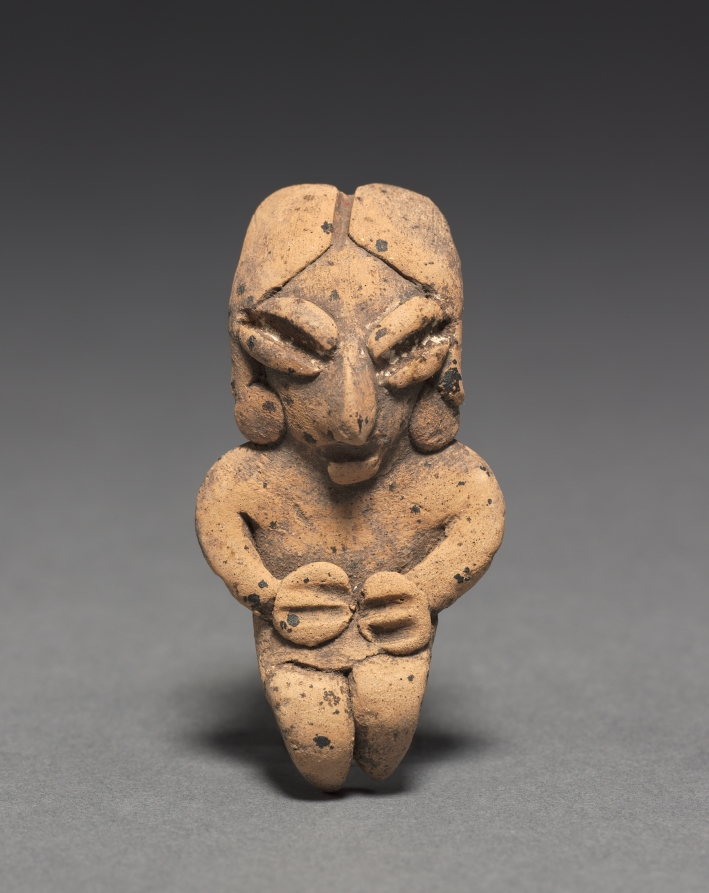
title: Figurine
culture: Mesoamerica, Mexico, Guanajuato, Chupícuaro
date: 400–100 BCE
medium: pottery with traces of white and red pigment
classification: Sculpture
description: The Chupícuaro culture, located north of Mexico City in the state of Guanajuato, created a distinctive ceramic tradition including small clay figurines. This example is said to belong to a group of ten figurines from the same burial or cache (1990.145–154). The group includes both males and females that can be sorted into couples based on size.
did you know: Groups of figurines were sometimes arranged in scenes and likely used in household rituals.